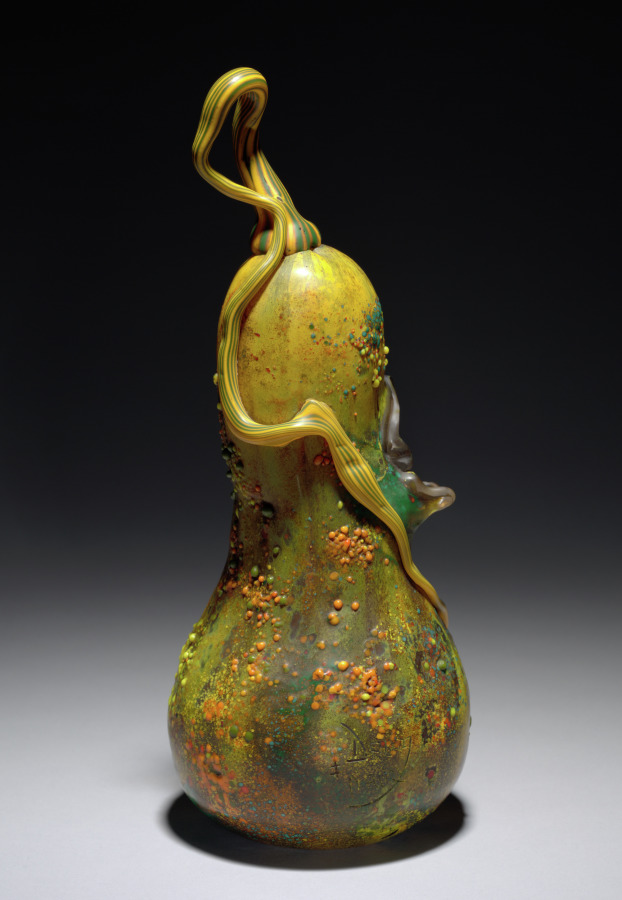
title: Vase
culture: France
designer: Daum Frères (French, founded 1875)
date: c. 1910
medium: Blown, cast, and vitrified glass with applied, wheel-engraved decoration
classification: Glass